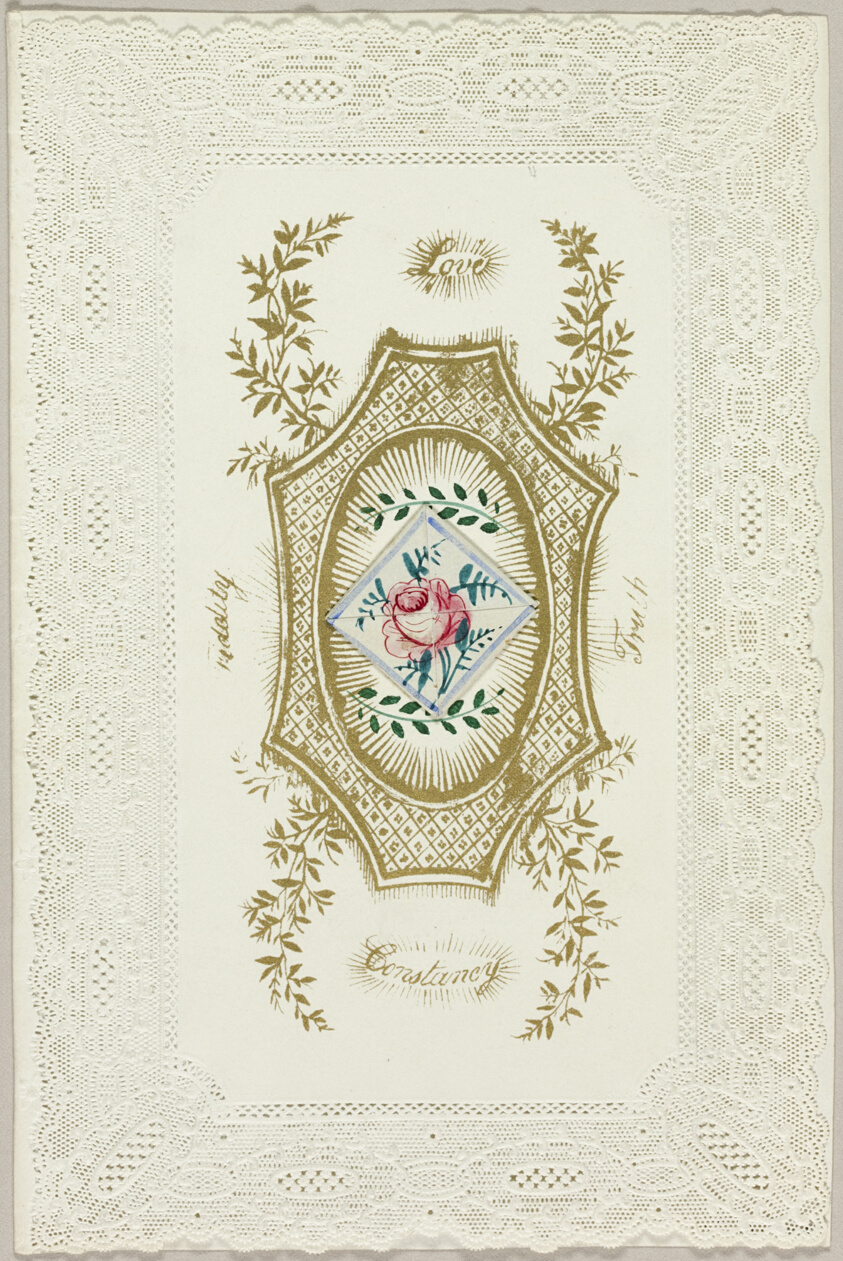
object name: Print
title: Love, Truth, Constancy, Fidelity (Valentine)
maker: Unknown Artist; English, 19th century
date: c. 1850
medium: Lithograph in gold ink, with collage and watercolor on cut and embossed ivory wove paper (lace)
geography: England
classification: valentine; prints and drawing; print